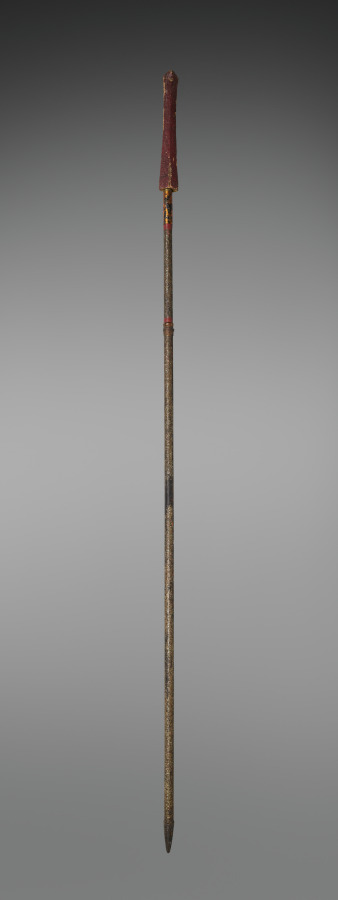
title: Spear with Sheath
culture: Japan, Edo period (1615–1868)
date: 1700s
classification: Arms and Armor